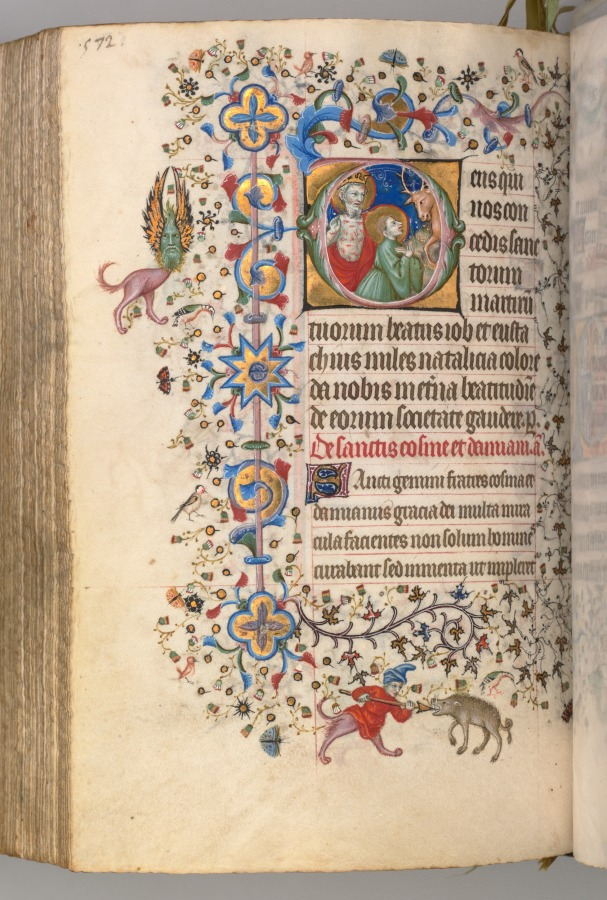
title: Hours of Charles the Noble, King of Navarre (1361-1425): fol. 280v, SS. Job and Eustace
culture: France, Paris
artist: Master of the Brussels Initials and Associates (French)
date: c. 1405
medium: ink, tempera, and gold on vellum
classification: Bound Volume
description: This precious volume was obviously highly prized by its owner, the French-born King of Navarre, who had his coat of arms painted on no less than twenty folios. Rather than directly commissioning this manuscript from a specific workshop, it seems that Charles the Noble acquired his book of hours -- perhaps ready-made for the luxury market -- while on a trip to Paris in 1404-05. A collaborative effort, six painting styles are evidenced within the pages of this codex, those of two Italians, two Frenchmen, and two Netherlanders. The painter who was responsible for the planning and decoration of the book, and who produced seventeen of the large miniatures, was a Bolognese artist known as the Master of the Brussels Initials. His principal assistant, responsible for most of the borders, was a Florentine who signed his name "Zecho" da Firenze on folio 208 verso.